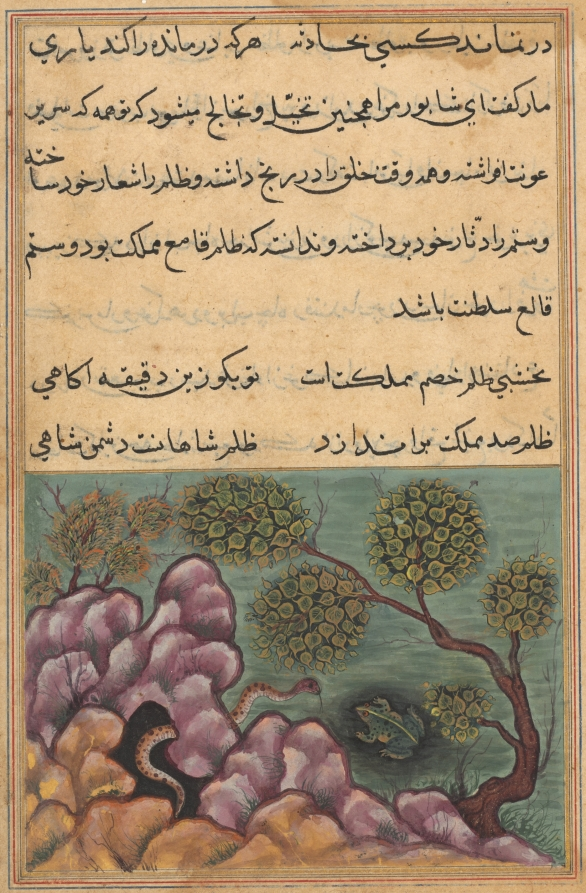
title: The dethroned frog Shapur seeks the help of the serpent, from a Tuti-nama (Tales of a Parrot): Twenth-sixth Night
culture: Mughal India, court of Akbar (reigned 1556–1605)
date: c. 1560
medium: gum tempera, ink, and gold on paper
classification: Painting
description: Shapur, who had long ruled as king of the frogs, was overthrown and exiled for cruelty. Seeking revenge on his political enemies, he sought the allegiance of a frog-eating serpent. The serpent’s lair is shown in cross section amid the heavily shaded rocks. A pipal tree (ficus religiosa), native to India, bends over the body of the frog. This story is set in China, and the emphasis on the layers of shaded rocks may suggest the artist’s impression of a Chinese landscape. Moreover, the snake’s markings appear to be those of a Chinese Mountain pit viper.